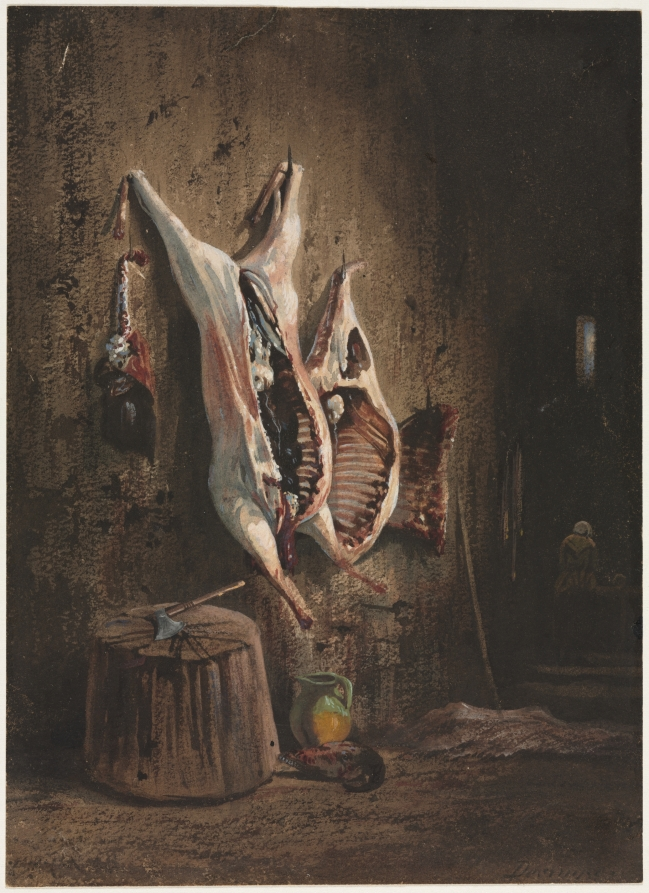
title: Carcasses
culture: France, 19th century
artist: Alexandre-Gabriel Decamps (French, 1803–1860)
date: 1840–1860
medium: watercolor and gouache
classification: Drawing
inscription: signed, lower right, in black gouache: Decamps; verso, upper right, in graphite: 73; upper center, in graphite: [illegible] [Bruget?] / a [Degert?] [all partially erased]; upper center, in graphite: (Decamps [written over previous inscription]; center, in graphite: 19 [circled]; lower right, in graphite: 19 x 12 2; lower left, in graphite: 82; lower right, in graphite: d559cfe 2 s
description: With the subject of Carcasses, Alexandre-Gabriel Decamps was following an old artistic tradition. He was inspired by Rembrandt's (1606-1669) Slaughtered Ox (see photo) which he would have seen at the Louvre Museum. Decamps greatly admired the Dutch master and owned several paintings by him. In spite of the inspiration from Rembrandt, Decamps's watercolor of about 200 years later conveys a different mood. Instead of focusing on a single butchered corpse as Rembrandt had, Decamps viewed his bodies and slabs of meat from further back, and he included domestic objects and a background figure standing at a table. Decamps's resulting image stands less as a symbol of death and more as a matter-of-fact representation of daily life.